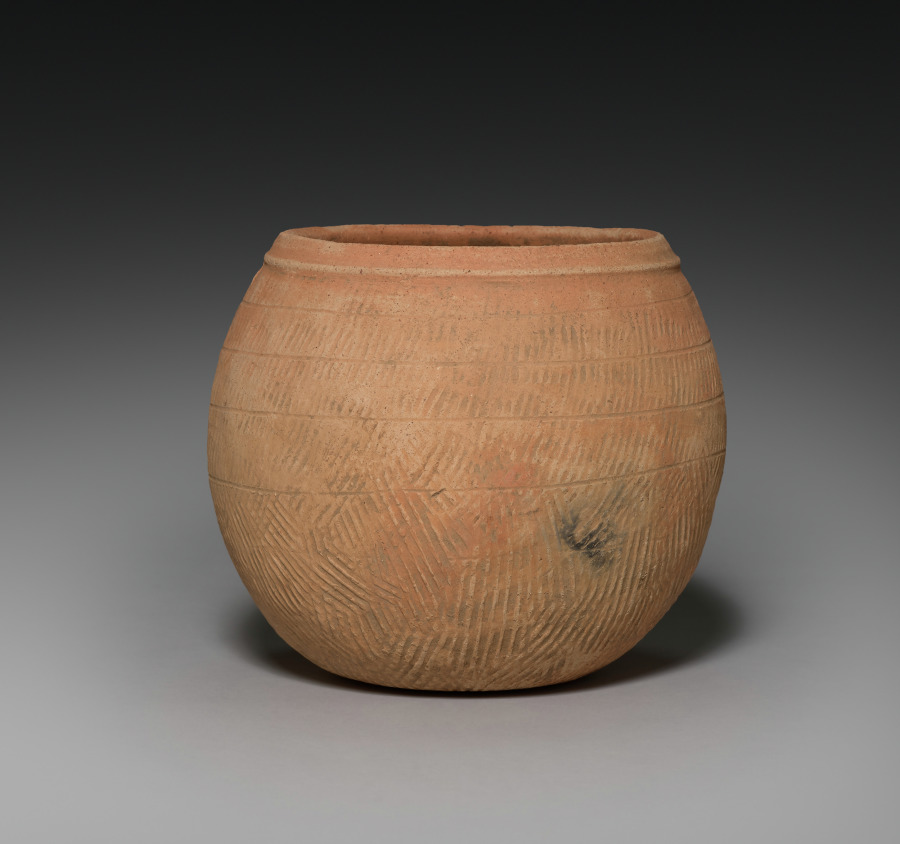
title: Lidded Vessel with Loop Handles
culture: Korea, Iron Age (c. 300–57 BCE)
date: 300–1 BCE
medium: earthenware, with impressed, paddled, and incised decoration and red slip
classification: Ceramic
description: This small storage jar was hand built from coils of clay before it was finished on a potter's wheel. The thick, vertical ridges covering the surface were impressed into the wet clay using a carved wooden paddle. This network of raised lines was then intersected by four incised lines coursing around the bulbous form and separating the body into lower and upper areas with deft visual simplicity. Such direct, effective design solutions to ceramic decoration appear frequently in early Korean ceramics. The two perforations in the upper body were no doubt used to help secure the lid to the body with cord.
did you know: Closed kilns built on hills became widely used for producing this type of pottery vessel in Korea during the Three Kingdoms period.